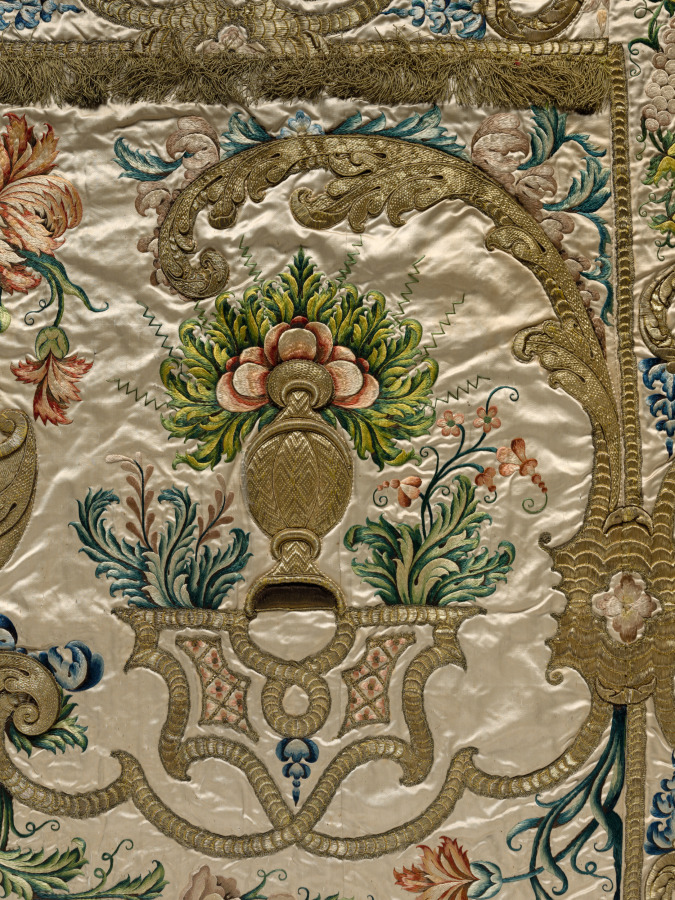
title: Embroidered Front of an Altar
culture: Italy or Spain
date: 1600s–1700s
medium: Satin and silk: embroidery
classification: Embroidery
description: This spectacular cloth with raised three-dimensional embroidery embellished the front of an altar. Lavishly applied gilt-metal thread creates architectural embellishments enhanced by grand vases displaying sheaves of wheat in the upper corners and bunches of grapes in the center of the fringed over-frontal, referring to the bread and wine of the Mass. The central coat of arms represents the Order of the Blessed Virgin Mary of Mercy, a Roman Catholic mendicant order established in 1218 by Saint Peter Nolasco in the city of Barcelona, Spain, then in the principality of Catalonia (crown of Aragon).